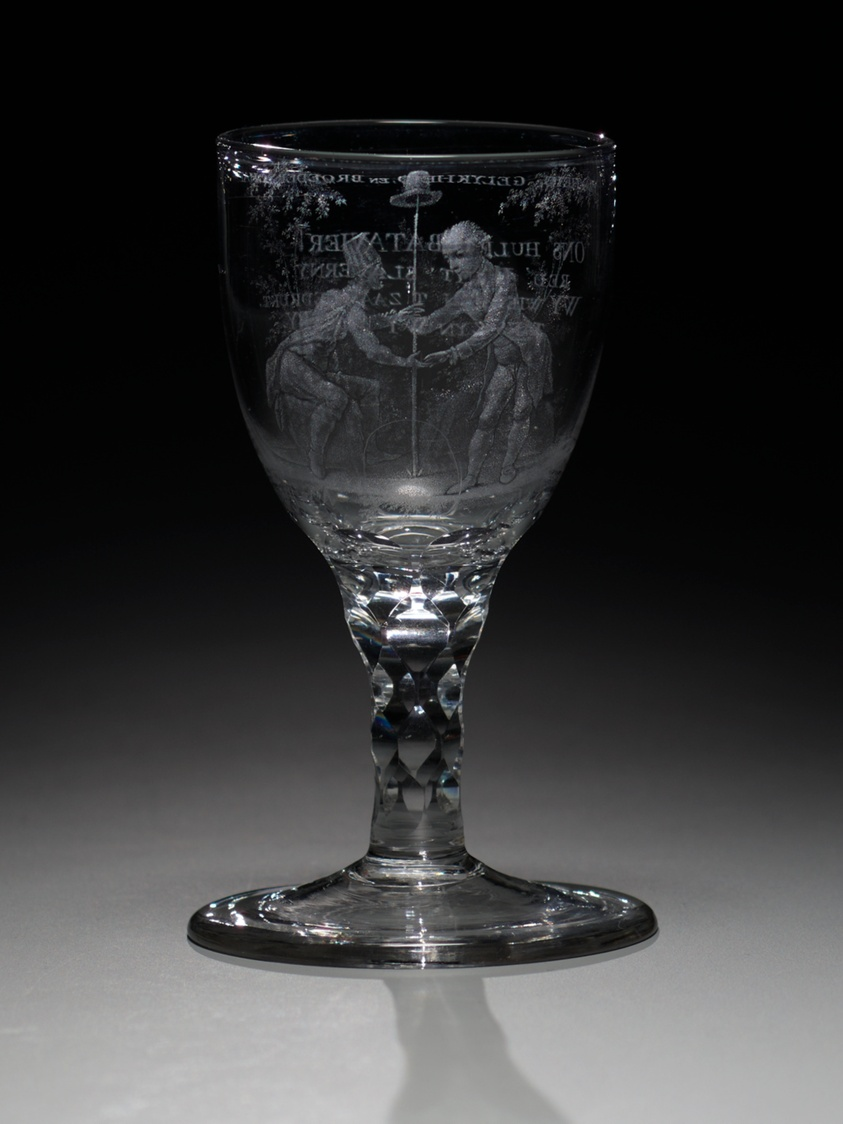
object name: Glass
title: Wine Glass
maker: England or Netherlands; Engraved: Northern Netherlands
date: January 26, 1795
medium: Glass; cut and stipple engraved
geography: England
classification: drinking vessel; glass; european decorative arts